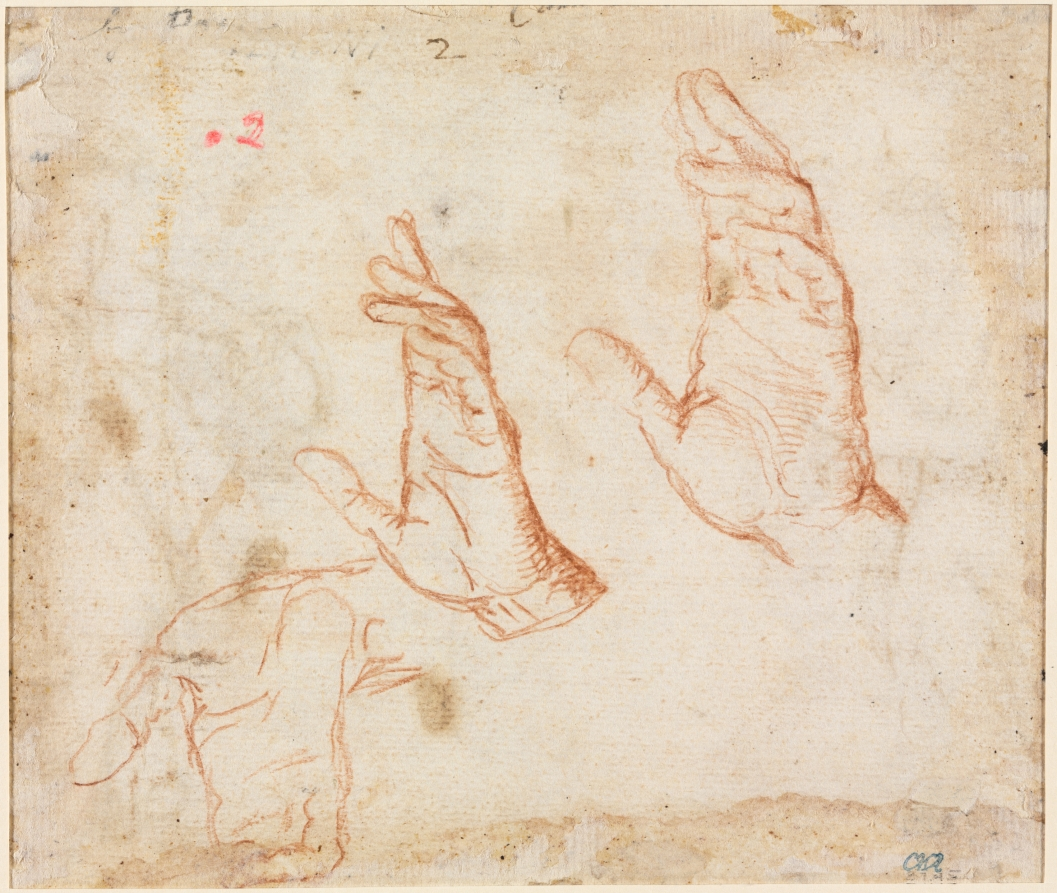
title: Study of Hands (verso)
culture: Italy, 16th century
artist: Camillo Procaccini (Italian, 1546–1629)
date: c. 1590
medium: red chalk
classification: Drawing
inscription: upper center, in brown ink: [illegible, cropped] / 2 ; upper left, in graphite: by Pr[illegible]Ni ; upper left, in pink pencil: .2 ; lower right, in graphite: [STAT?] ; SECONDARY SUPPORT, lower right, in graphite: 00265[2?] [cropped]